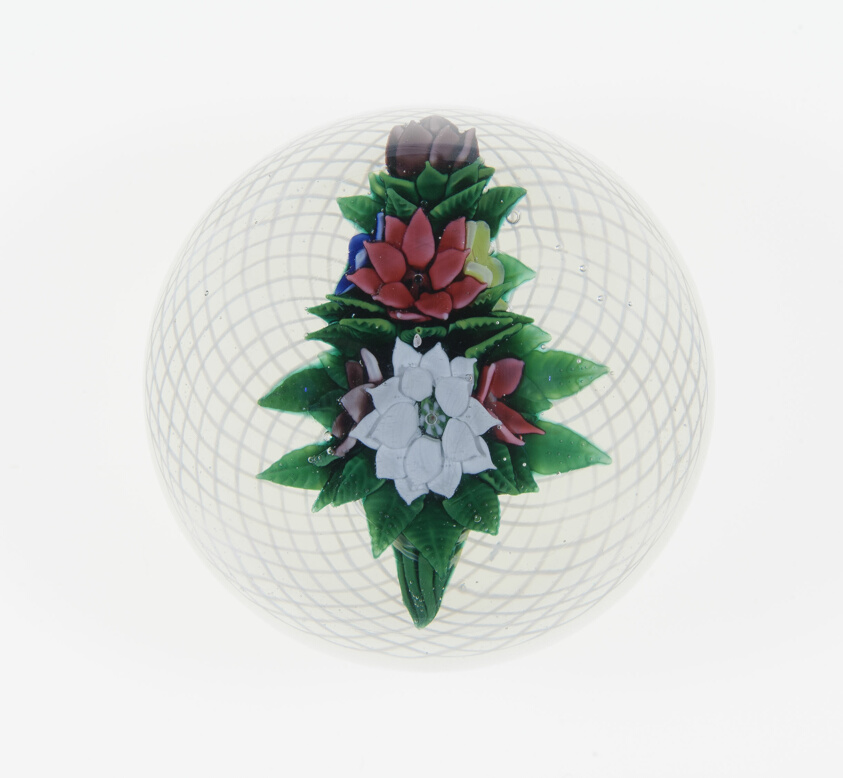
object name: Glass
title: Paperweight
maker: New England Glass Company (Cambridge, Massachusetts, 1818-1888)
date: Late 19th century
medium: Glass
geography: New England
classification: paperweight; glass